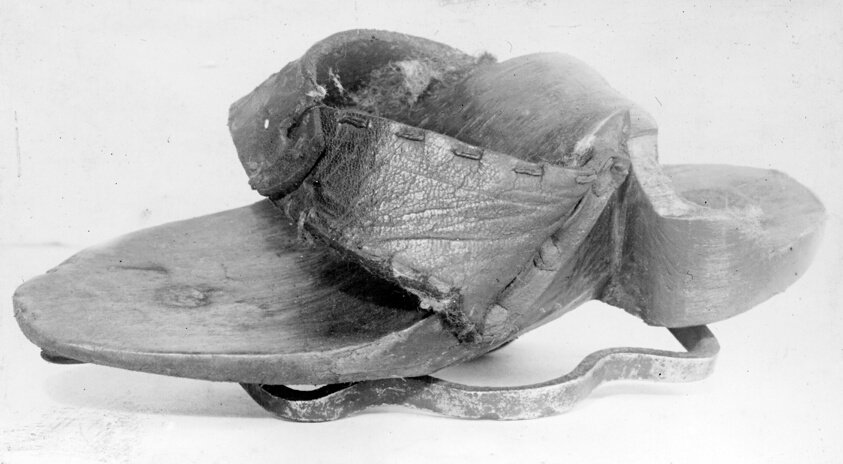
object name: Textile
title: Ringed Patten (Overshoe)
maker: England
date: 1660s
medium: Leather upper; stitched with wool and cotton in running stitches; lined with cotton and wool felt; wooden clog mounted on iron ring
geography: England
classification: textile; costume accessory - shoe; shoes - misc